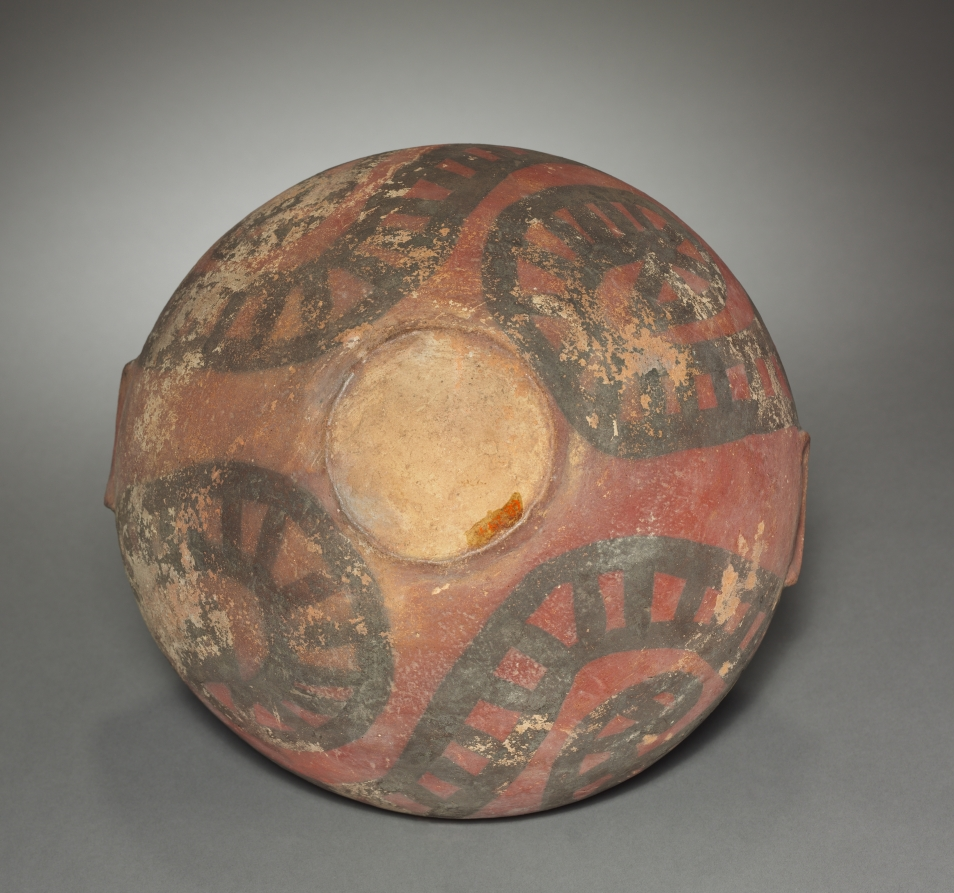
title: Two-Handled Bowl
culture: Argentina, Santamariana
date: 1000–1500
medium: earthenware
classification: Ceramic